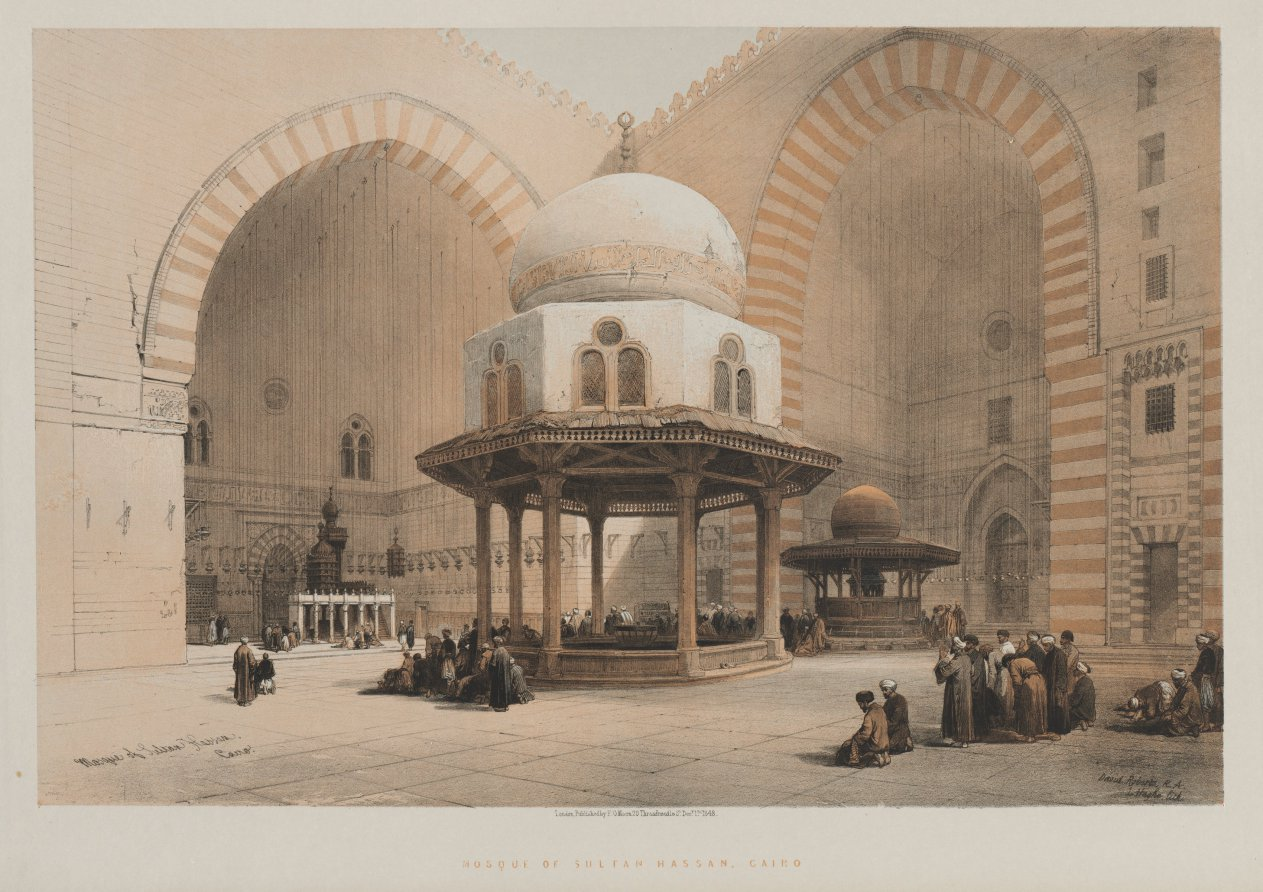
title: Egypt & Nubia, Volume III, No. 8: Mosque of Sultan Hassan, Cairo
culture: England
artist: Louis Haghe (British, 1806–1885)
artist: after David Roberts (Scottish, 1796–1864)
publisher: F. G. Moon, 20 Threadneedle Street, London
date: 1842–49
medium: color lithograph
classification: Print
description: The mosque and madrasa, school, of Sultan Hassan was built between 1356 and 1363 during the Mamluk period (1250–1517) in Egypt. The prestige of the project attracted craftspeople from across the Islamic world, which likely contributed to its innovative design. It is possible that stone from the Great Pyramid of Giza was used in its construction. This print features the central courtyard (sahn) with ablutions fountain (for washing one’s hands, feet, and face before prayer) and two of four monumental iwans, three-walled, vaulted rectangular halls. The interior walls and floor are covered in lavish stone and marble mosaics.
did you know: The minbar, a staircase-like pulpit from which a sermon is delivered by the prayer leader, imam, after Friday services, is visible in the hall on the left side of the print.